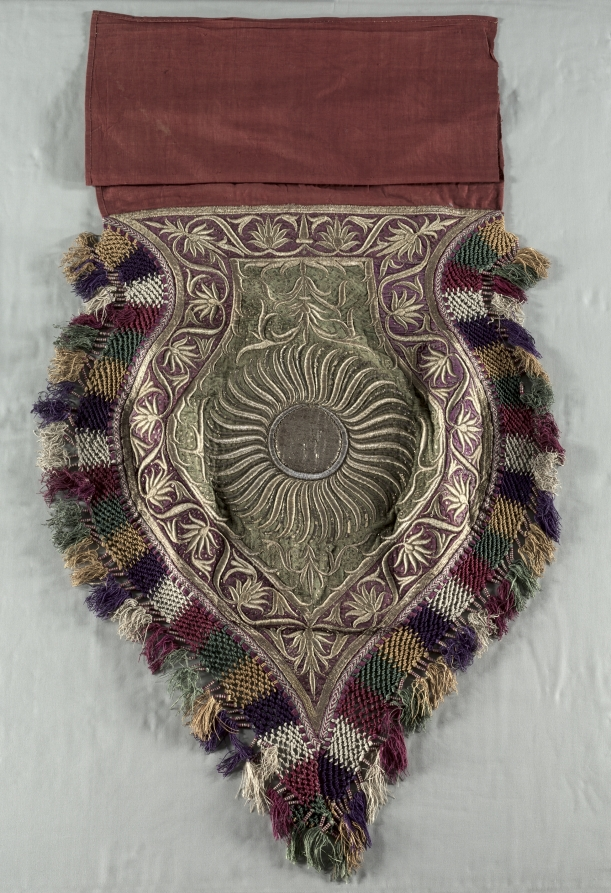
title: Embroidered Fragment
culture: India, 18th or 19th century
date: 1700s or 1800s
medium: embroidery; gold on velvet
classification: Embroidery